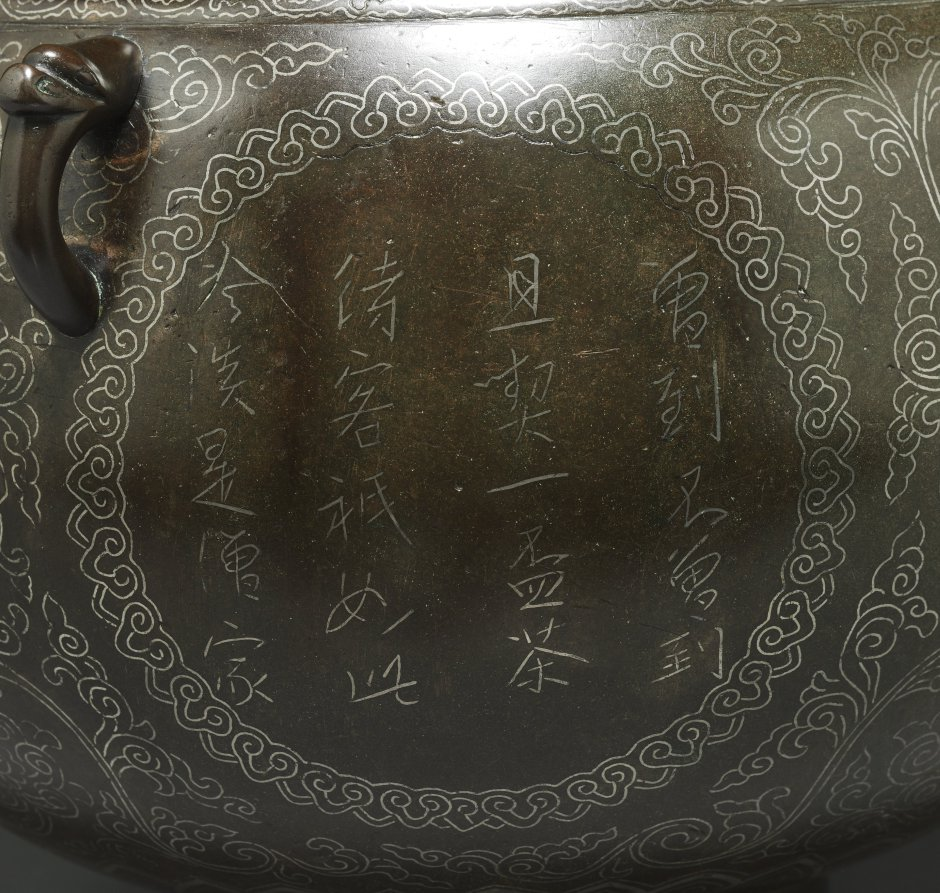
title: Basin with Inscribed Figures and Calligraphy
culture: Korea, Goryeo dynasty (918–1392)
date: 1100s–1200s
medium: bronze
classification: Metalwork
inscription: Each of the three roundels contain five-character, four-line poems with Buddhist messages.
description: This bronze basin may have been used for containing purified water. What makes this work charming is its intricate decoration done in silver inlay: the five-character, four-line poems interspersed among images of a child. The poems, which evoke the concept of nonattachment and nonduality, were written by Buddhist monks.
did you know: A child, one of the main decorative elements for this basin, is possibly a young Buddhist pilgrim named Sudhana, who took a long spiritual journey to search for enlightenment.